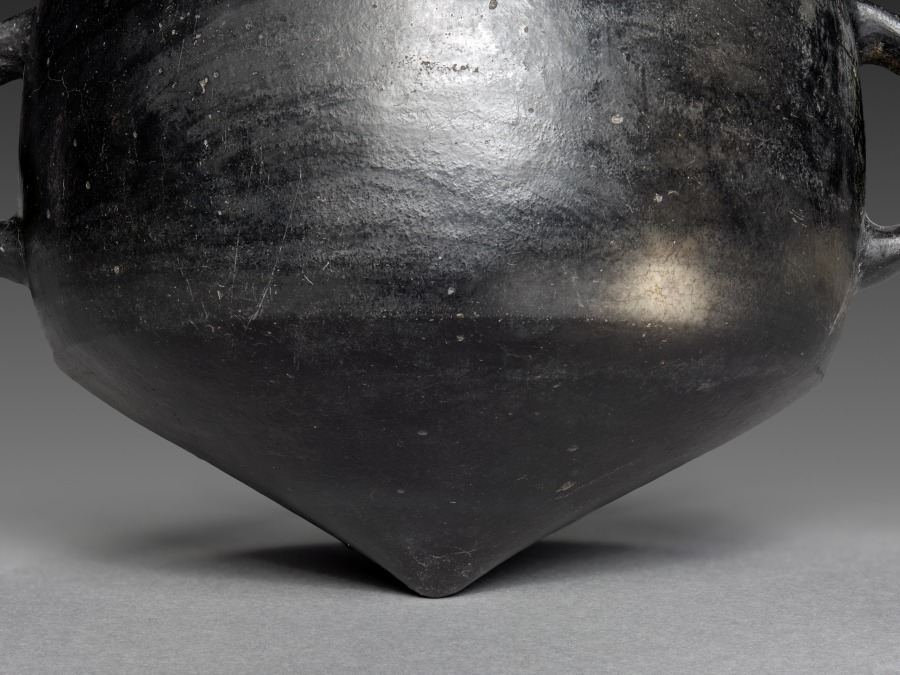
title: Hunchback Vessel (Aryballos)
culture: Central Andes (Peru), Chimú-Inka style, Late Horizon period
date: 1470–1521 (Thermoluminescence date, 1315–1615)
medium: ceramic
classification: Ceramic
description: This handsome vessel, along with the nearby double-chambered vessel, were made on the north coast after the Inka conquered the Chimú in the 1460s. Under Inka rule, many aspects of Chimú ceramic technology continued but new forms and subjects were introduced, such as the aryballos, a classic Inka vessel type. This example takes the form of a hunchback and may refer to the Inka predilection for employing hunchbacks as royal servants.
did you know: Hunchbacks seem to have functioned as servants in Inka royal palaces.